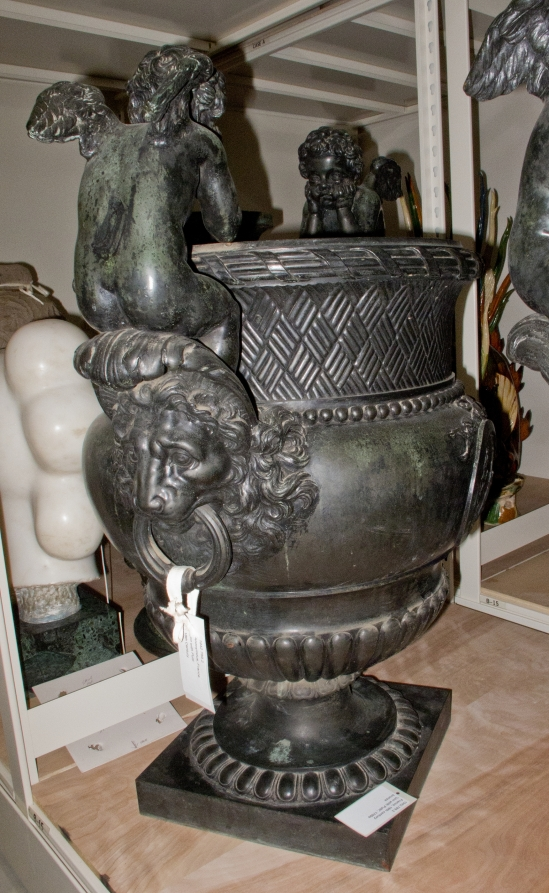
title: Urn with Putti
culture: France, 18th century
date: 1700s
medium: bronze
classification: Metalwork